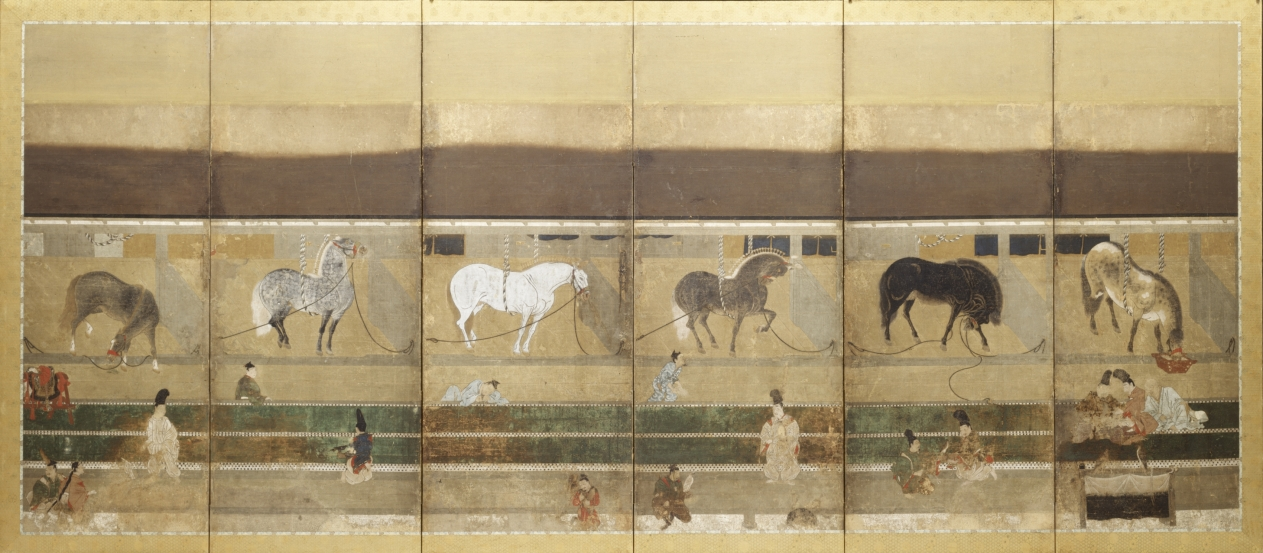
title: Horse Stable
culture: Japan, Muromachi period (1392–1573)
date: early 1500s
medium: One of a pair of six-panel folding screens; ink, color, and gold on paper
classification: Painting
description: Prized horses in stables may be the main theme of the pair of screens to which this screen belongs, but a lot of action is happening on the verandas. Here, people challenge one another at two different board games, go and shōgi. A lively atmosphere develops in the interplay of the dynamic horses and the strategic games.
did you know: Shōgi means "military leader's board game."